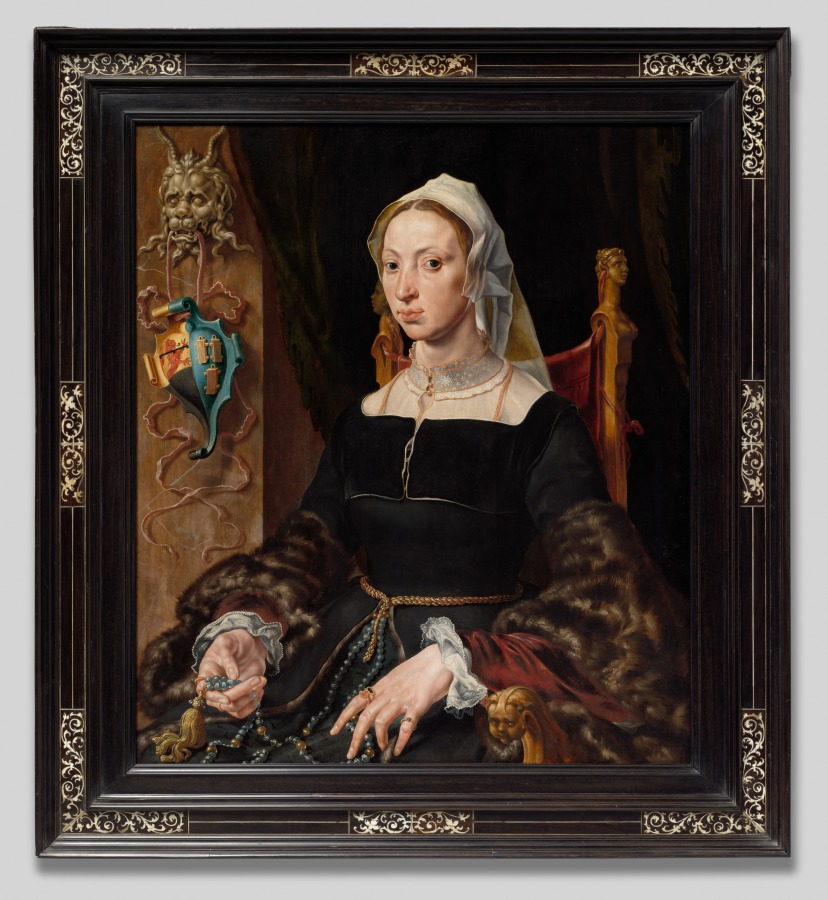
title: Portrait of Machtelt Suijs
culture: Flanders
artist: Maerten van Heemskerck (Dutch, 1498–1574)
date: c. 1540–45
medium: oil on wood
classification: Painting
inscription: note on cradle appears on a notation in chalk (originally) slightly scratched faintly letters " Mr A.M.C [?] or K [?] Reyve"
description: Maerten van Heemskerck lived in Rome for four years (1532–36) and was deeply affected by the city's art and antiquities. Here, the half-length, seated figure, the tense yet elegant hands, and even the grotesque classical mask reflect the impact of that experience, while the love of meticulously represented textures is traditionally associated with northern European art. Machtelt Suijs married Dirick van Teijlingen in 1535 and lived in Alkmaar (the Netherlands), where Heemskerck must have painted her. The coat-of-arms that hangs from the mask combines family emblems, indicating that her portrait must have been accompanied by one (now lost) of her husband.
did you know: The coat of arms depicts golden pile drivers, indicating the family construction business.